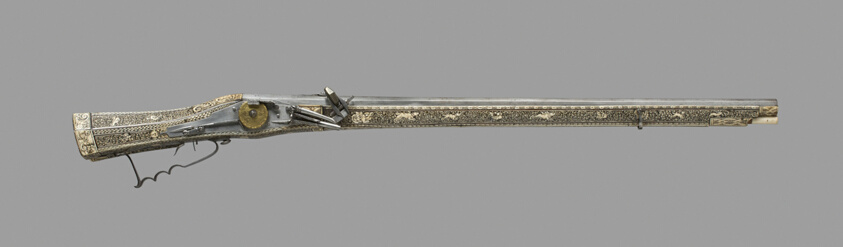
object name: Arms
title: Wheellock Rifle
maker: German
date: 1577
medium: Steel, gilded brass, iron, wood, and horn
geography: Germany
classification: firearm-long gun; arms; arms and armor